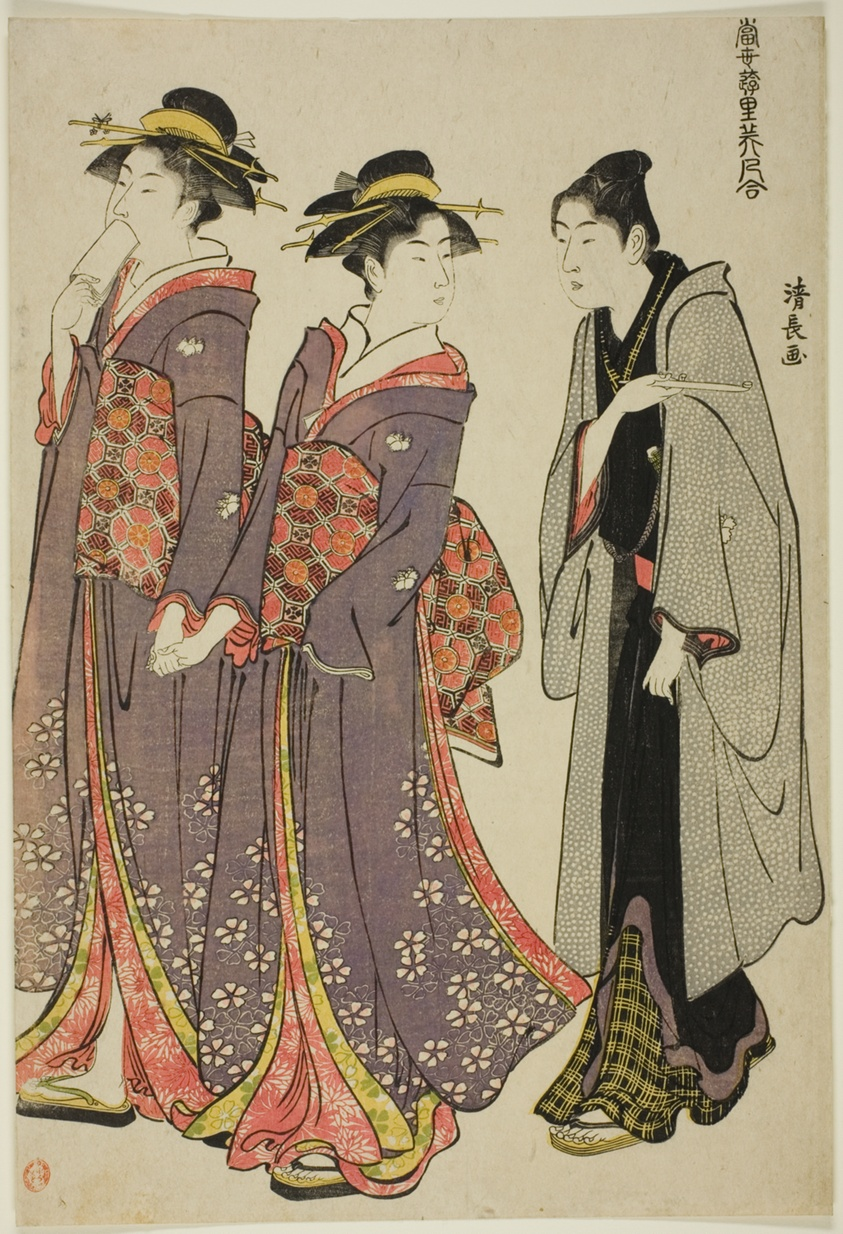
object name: Print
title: Out for a Walk, from the series "A Collection of Contemporary Beauties of the Pleasure Quarters (Tosei yuri bijin awase)"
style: Japanese (culture or style)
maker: Torii Kiyonaga (Japanese, 1752-1815)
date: c. 1783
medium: Color woodblock print; oban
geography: Japan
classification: woodblock print; print; asian art